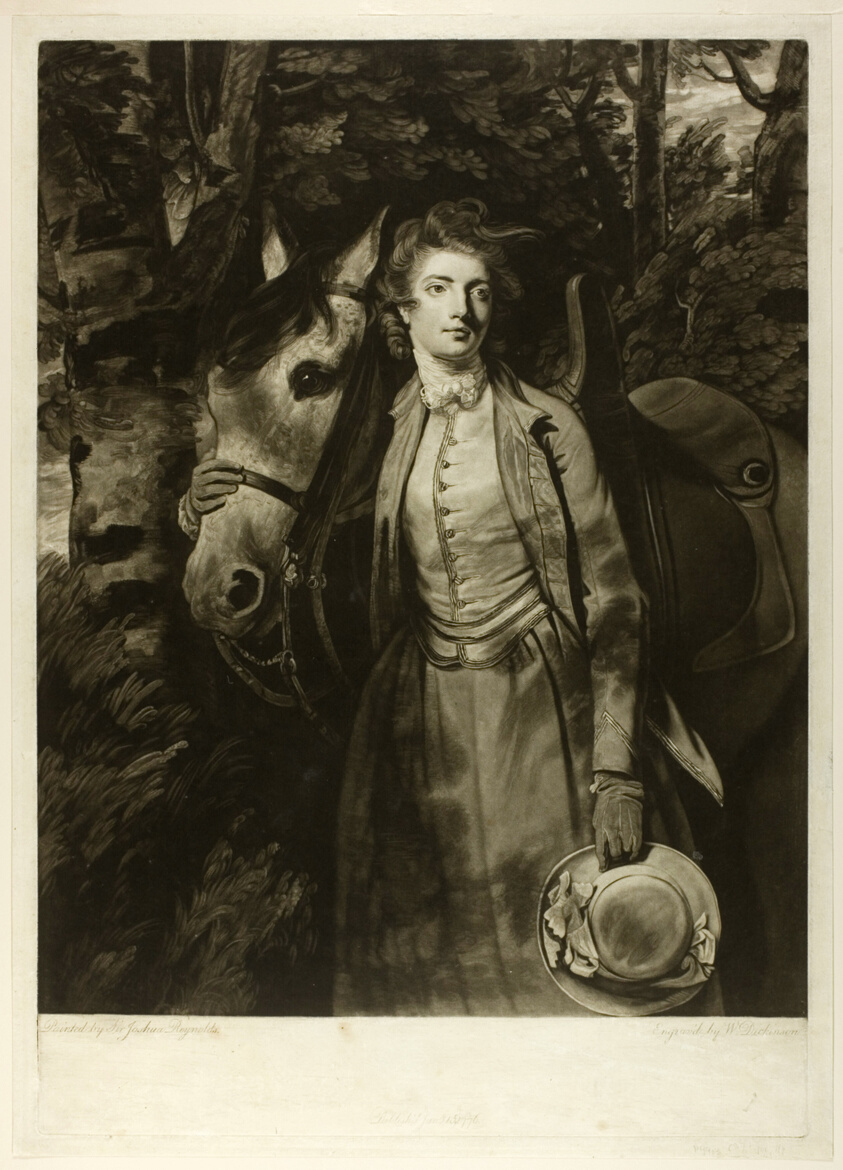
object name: Print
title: Lady Charles Spencer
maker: William Dickinson (English, 1746-1823); after Sir Joshua Reynolds (English, 1723-1792)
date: 1776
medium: Mezzotint on ivory laid paper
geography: United Kingdom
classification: mezzotint; print; prints and drawing